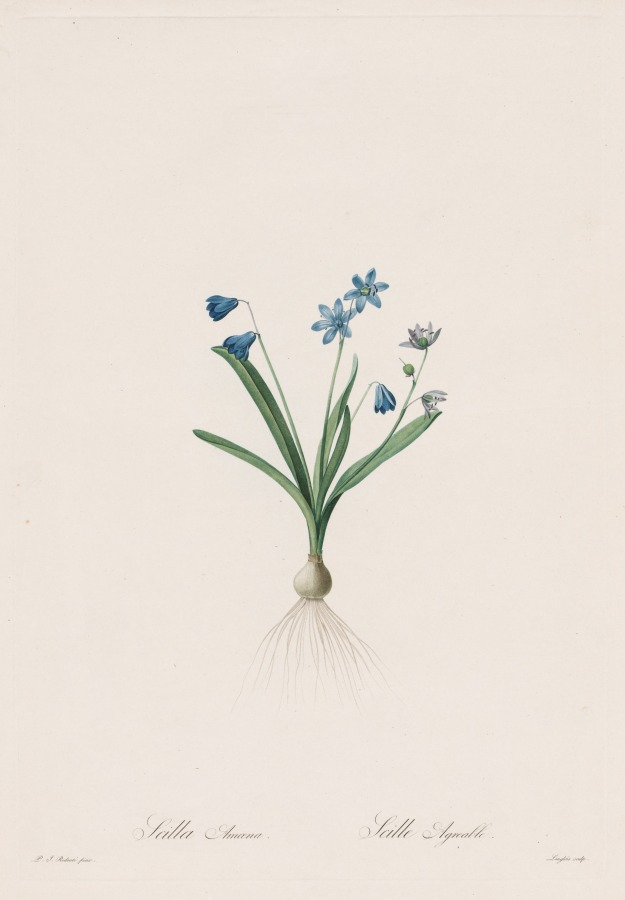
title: Les Liliacées: Scilla amaena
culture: France, 19th century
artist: Pierre-Joseph Redouté (French, 1759–1840)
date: 1802–16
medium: stipple and line engraving, with hand coloring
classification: Print